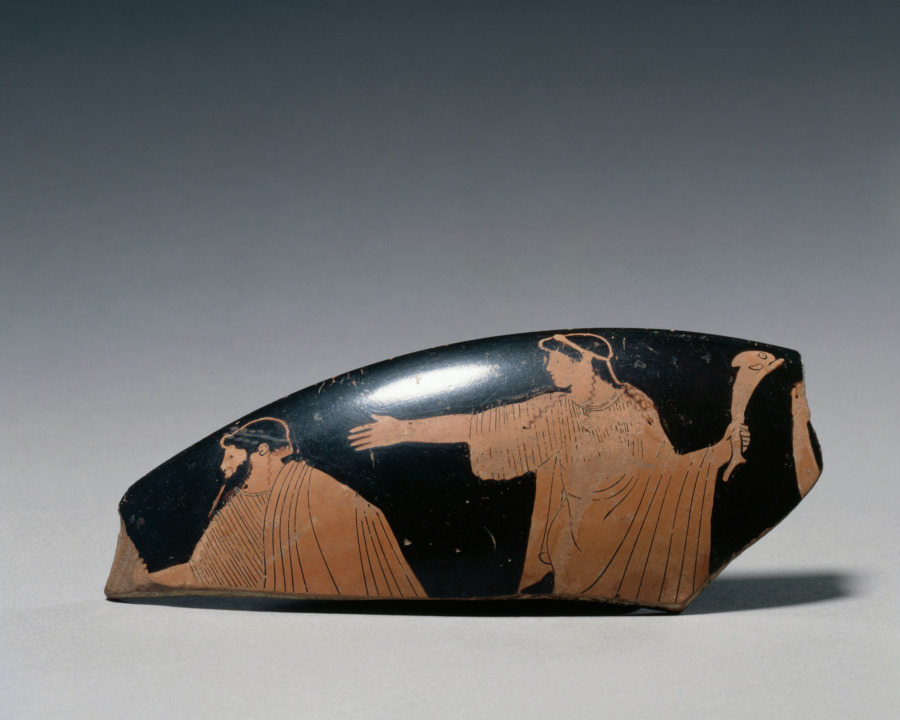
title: Fragment from Red-Figure Kylix: Nereus(?) and Nereid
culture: Greek, Attic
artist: manner of Pistoxenos Painter (Greek, Attic, active c. 470–460 BCE)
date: c. 470–460 BCE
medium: ceramic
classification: Ceramic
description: Broken from the rim and bowl of a drinking cup, this fragment shows a woman looking back and moving away from a bearded man. Because she holds a dolphin, she is likely a Nereid, or sea nymph. The man may be her father, Nereus, although he is usually shown with white hair and beard (appropriately, for he is often called “Old Man of the Sea”).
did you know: Nereus, a god of the sea, had 50 daughters, known as Nereids.